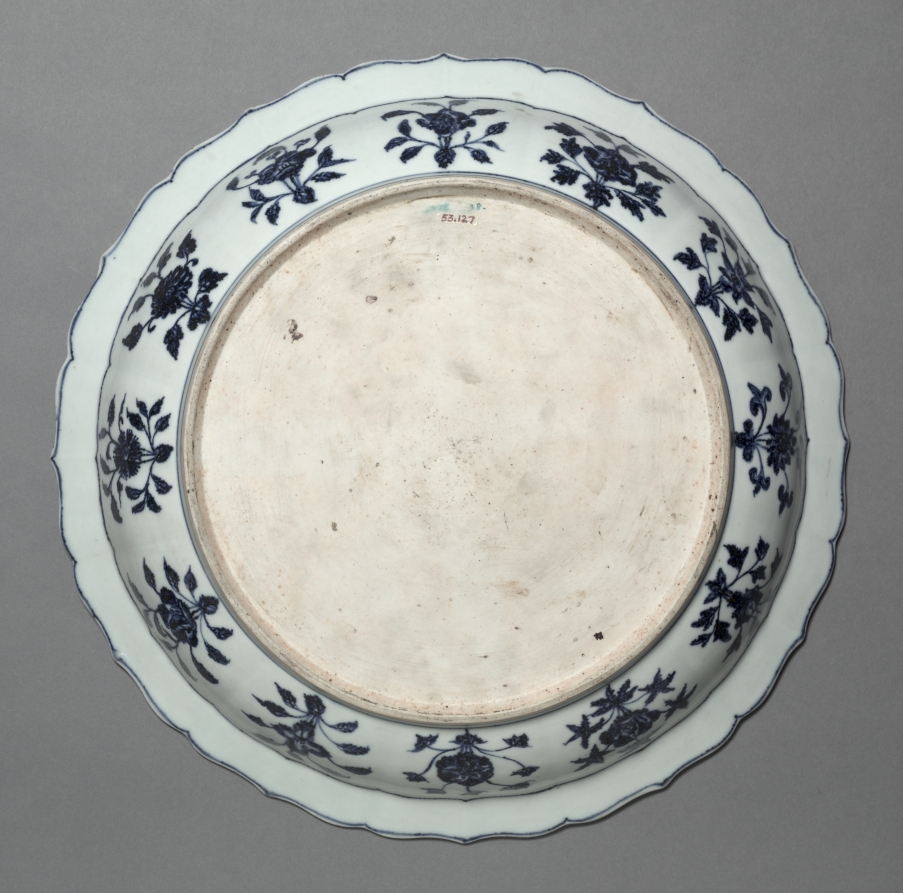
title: Plate with Grapes and Floral Sprays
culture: China, Jiangxi province, Jingdezhen, Ming dynasty (1368-1644), Yongle period (1403-24)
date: 1403–24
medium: porcelain with underglaze blue decoration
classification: Ceramic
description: This large platter with grape and floral decoration, which is different from small stem cups decorated with dragons, CMA 1957.60 and CMA 1964.168, was made primarily for export to southeastern and western Asia. However, a similar example bearing the Xuande reign mark has also been excavated from the Ming imperial kilns at Jingdezhen.